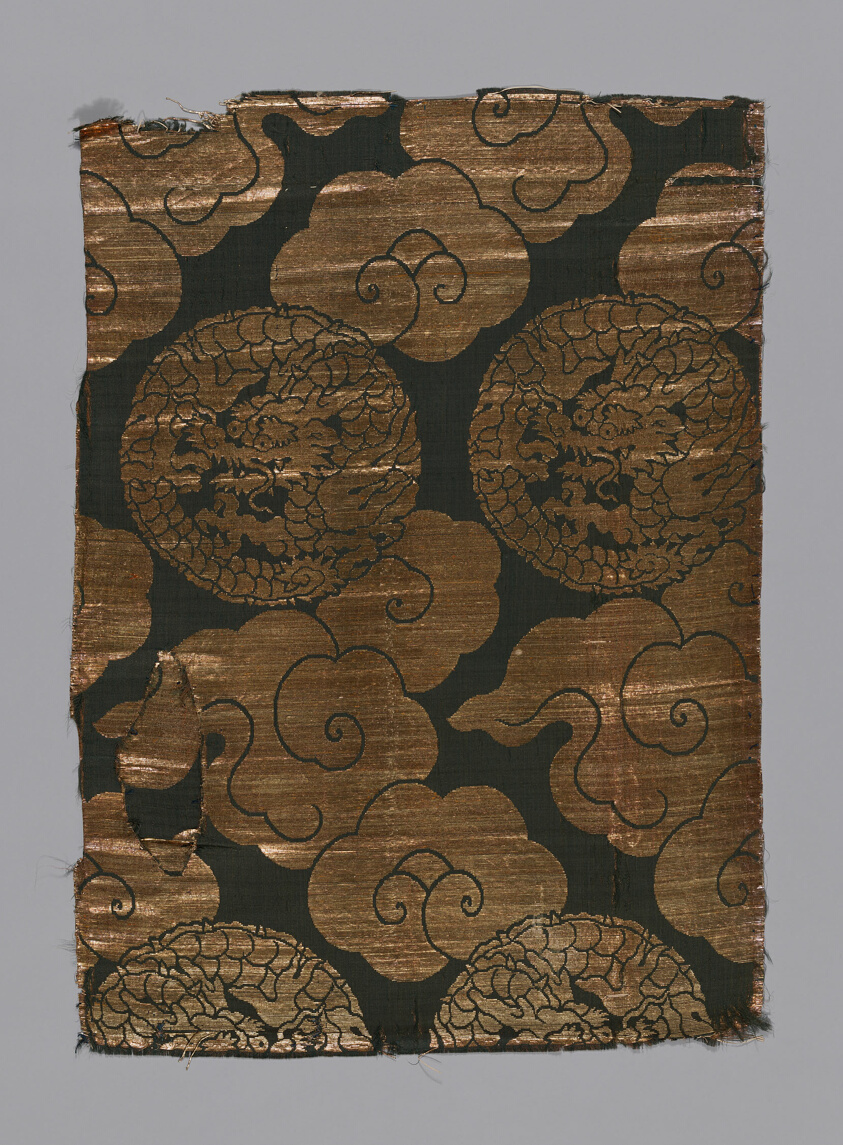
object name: Textile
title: Fragment (From a Temple Hanging)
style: Japanism, East Asian, late edo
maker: Japan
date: late Edo period (1789–1868), 1801/25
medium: Silk and gold-leaf-over-lacquered-paper strip, warp-float faced 3:1 'Z' twill weave with plain interlacings of secondary binding warps and supplementary patterning wefts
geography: Japan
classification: textile; weaving